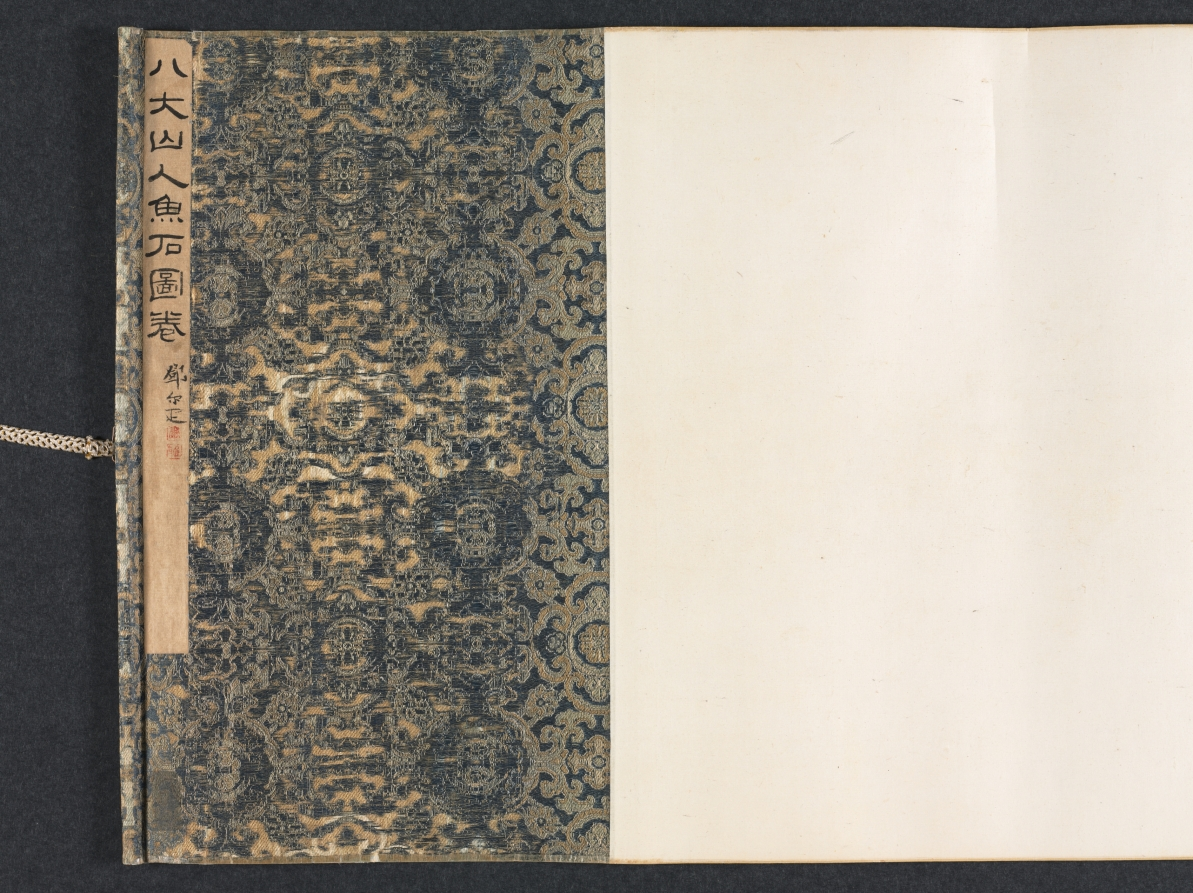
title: Fish and Rocks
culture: China, Qing dynasty (1644-1911)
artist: Bada Shanren (Chinese, 1626–1705)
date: mid- to late 1600s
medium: Handscroll; ink on paper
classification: Painting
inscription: 去天纔尺五，只見白雲行。 云何畫黃花，雲中是金城。 [印] 个山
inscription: 雙井舊中河，明月時延佇。 黃家雙鯉魚，為龍在何處。 [印] 个山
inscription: 三萬六千頃，畢竟有魚行。 到此一黃頰，海潮次上笙。 [印] 个山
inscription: 5 additional seals: 2 of Zhang Daqian 張大千 (1899–1983); 1 of Ta-an Chü-shih; 2 unidentified.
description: Bada Shanren, also called Zhu Da, a 17th-century painter who rejected conventions in favor of an individual, personal expression, is known for his unorthodox compositions of fish, flowers, birds, and rocks. Fish in his paintings are often looking upward toward heaven, swimming in a pond of undefined space. As a member of the Ming imperial family, Zhu Da lost his princely status and hid in a monastery when the Manchus, foreigners from the north, established the Qing dynasty in 1644. This scroll may have some autobiographical meaning, representing fish as leftover subjects (yimin) who lived in a void, having lost their roles in life after the fall of the dynasty.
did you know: After each poem, Bada Shanren used his so-called jixingyin seal 屐形印, which resembles the impression of a shoe on soft mud.